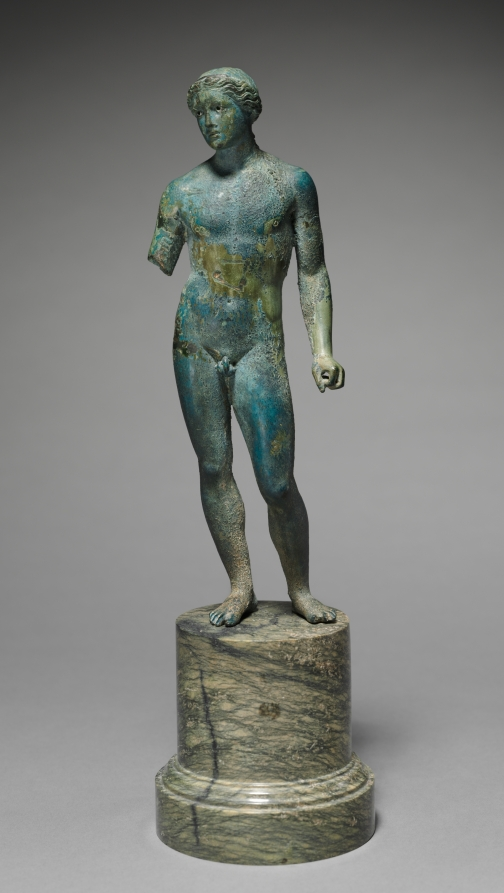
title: Athlete or Apollo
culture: Greece, Macedonia(?)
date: probably 100–1 BCE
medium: bronze with silver inlays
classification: Sculpture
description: This bronze statuette depicts a nude male, perhaps a young athlete or the youthful god Apollo. The figure is made from solid bronze, with a fillet of inlaid silver on his head. The figure’s right arm is broken off just above the elbow. If this is a statue of Apollo, he may have once held a bow and arrow; if it depicts an athlete, he could have held athletic equipment, a symbol of victory, or an offering dish.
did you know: The eyes of this figure are decorated with inlaid silver.